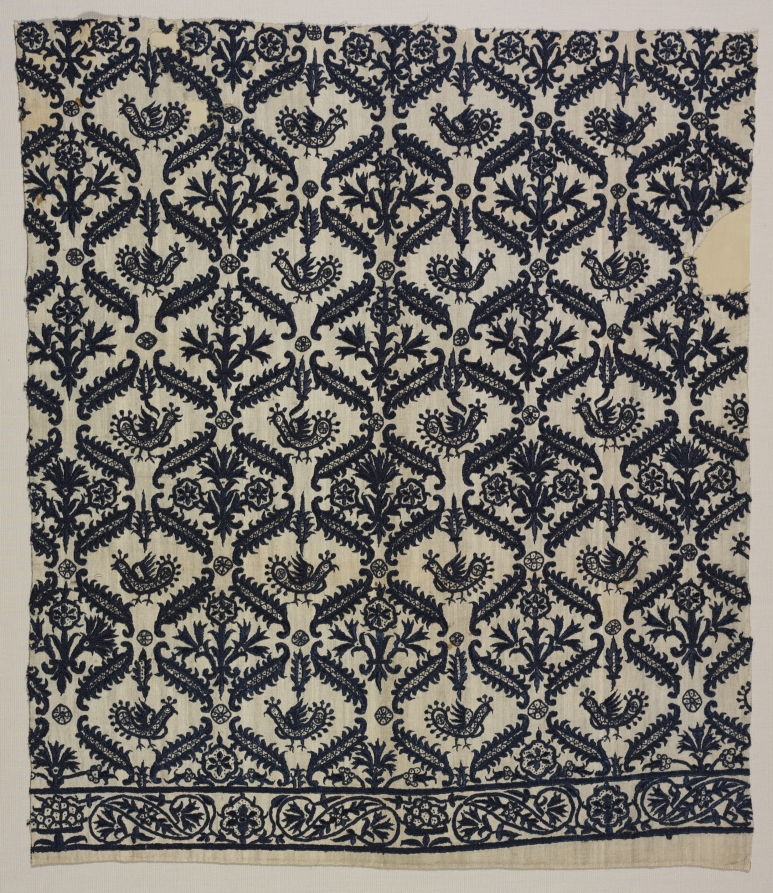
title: Fragment of a Bed Curtain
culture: Greece, Crete, 17th-18th century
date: 1600s - 1700s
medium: embroidery: silk on linen tabby ground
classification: Embroidery